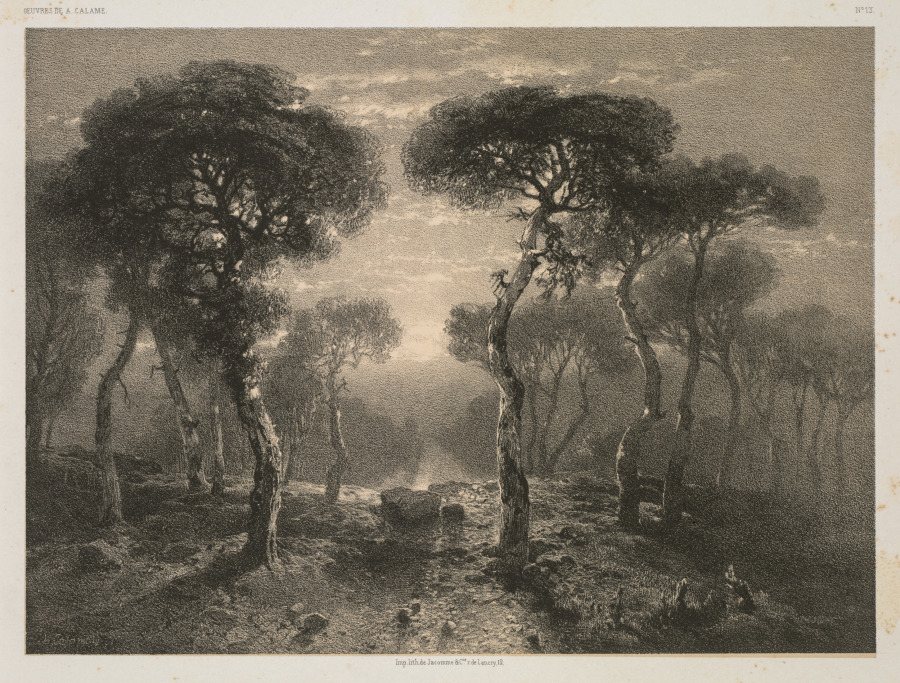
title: Oeuvres de A. Calame, No. 13: Forêt de Sierre en Valais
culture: France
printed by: Jacomme & Cie. R. de Lancry, 12, Paris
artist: Alexandre Calame (Swiss, 1810–1864)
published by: F. Delarue, r. J.J. Rouseau, 10, Paris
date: 1843 (published 1851)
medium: lithograph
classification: Print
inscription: On plate; upper left corner: Oeuvres de A. Calame.; upper right: No. 13; below image center: Imp.lith.de Jacomme & Cie. R. de Lancry, 12.; below image left: Dessin, below image right: F. Delarue. Edit.r.JJ.Rousseau. 10.Paris